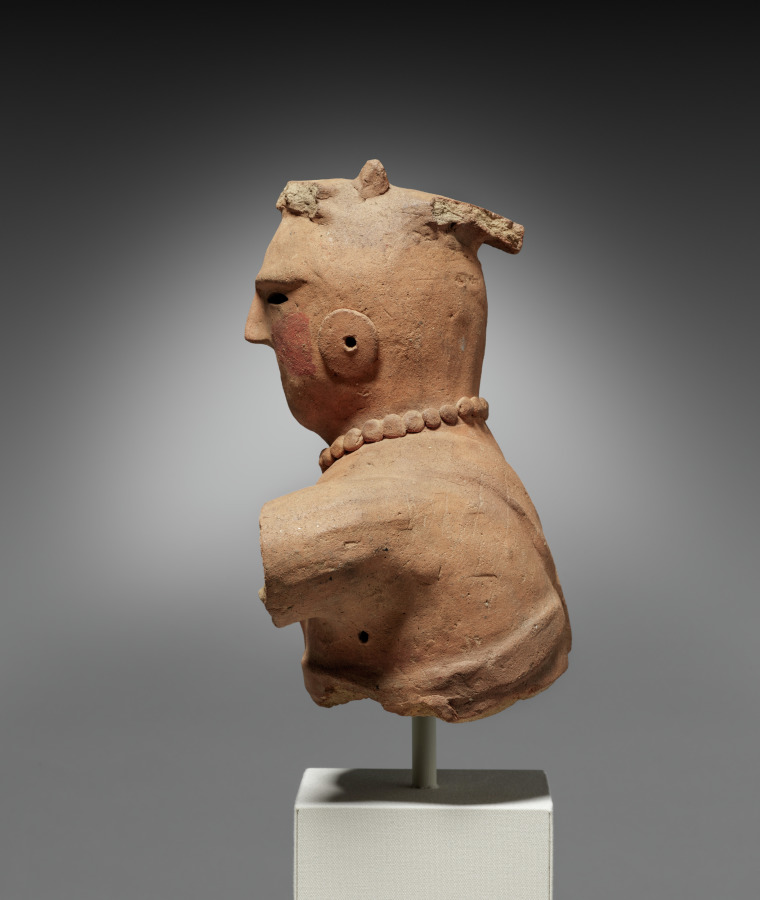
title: Haniwa Figure of a Female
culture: Japan, Kofun period (300–710 CE)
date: 500s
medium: earthenware with traces of pigment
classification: Sculpture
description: Figures in a variety of dress including military and ceremonial garb start to appear on Japanese earthen mounded tombs called old mounds (kofun) from the 400s to 500s CE. This fragment depicts a woman with red triangles on her face and wearing jewelry. Archaeologists speculate that the facial markings had a ritual or symbolic function, perhaps indicating she is a female shaman. Many figures of this kind have been found in digs in the Kanto region of eastern Japan. We can only guess at the meaning of the clay cylinders called haniwa.